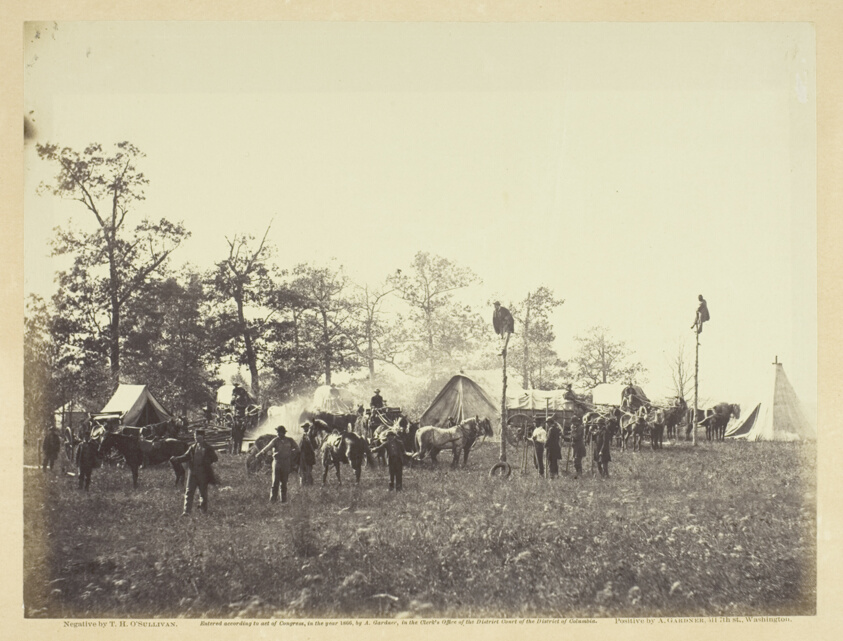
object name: Photograph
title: U.S. Military Telegraph Construction Corps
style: 19th century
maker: Timothy O'Sullivan (American, born Ireland, 1840–1882)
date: April 1864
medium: Albumen print, pl. 62 from the album "Gardner's Photographic Sketch Book of the War, Volume II" (1866)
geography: United States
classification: photograph; albumen silver print; photography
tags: Collected by Hugh Edwards, Gardner's Photographic Sketch Book